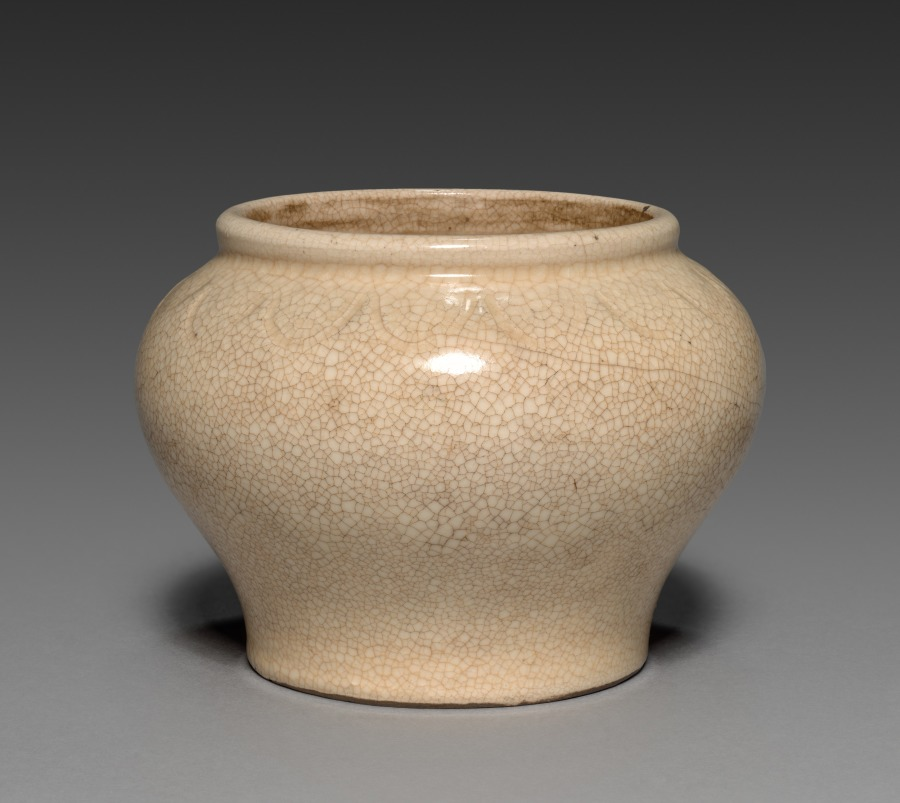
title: Jar (Satsuma ware)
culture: Japan, Meiji period (1868–1912)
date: 1868–1912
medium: pottery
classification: Ceramic